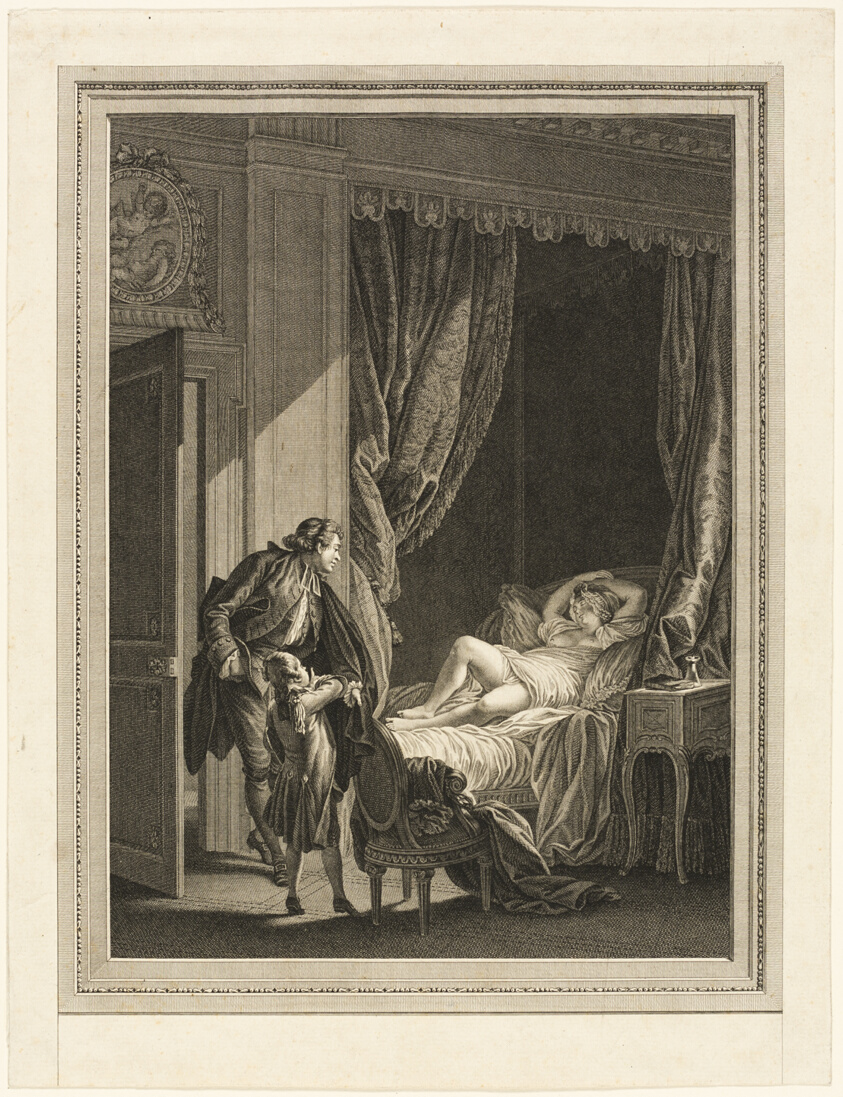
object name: Print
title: Morning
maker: Emmanuel Jean Nepomucene de Ghendt (French, 1738-1815); after Pierre Antoine Baudouin (French, 1723-1769)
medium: Etching on paper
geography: France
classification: etching; print; prints and drawing